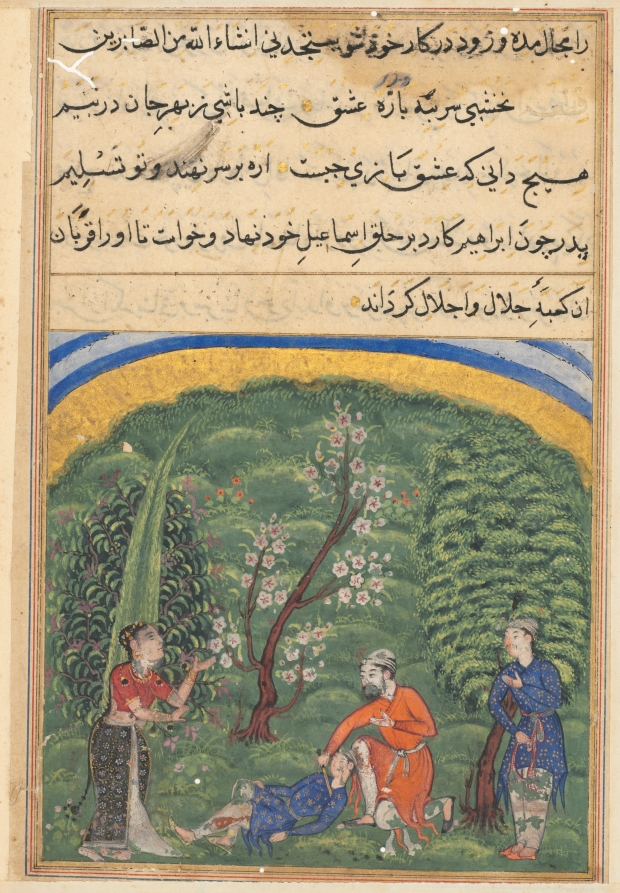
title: The sentinel in the employ of the Shah of Tabaristan prepares to sacrifice his son to the ghost of the Shah’s soul, from a Tuti-nama (Tales of a Parrot): Second Night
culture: Mughal India, court of Akbar (reigned 1556–1605)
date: c. 1560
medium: gum tempera, ink, and gold on paper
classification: Painting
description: The loyal sentinel, in orange, holds a knife to his son’s throat, ready to sacrifice him to save the life of his dying king, the shah. The shah himself watches from behind the tree on the right. At the left, the female personification of the shah’s soul intervenes, saving both the shah and the sentinel’s son.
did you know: The near sacrifice of the sentinel’s son parallels the Qur'an’s story of Abraham and Ishmael.